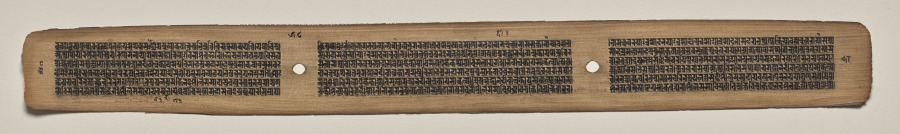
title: Text, Folio 58 (verso), from a Manuscript of the Perfection of Wisdom in Eight Thousand Lines (Ashtasahasrika Prajnaparamita-sutra)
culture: Eastern India, Bihar, Vikramashila Monastery. Painting: Nepal, Kathmandu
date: Sunday, September 14, 1119 (year 239 of the Newar Samvat in the month of Ashvina)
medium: gum tempera and ink on palm leaves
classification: Painting